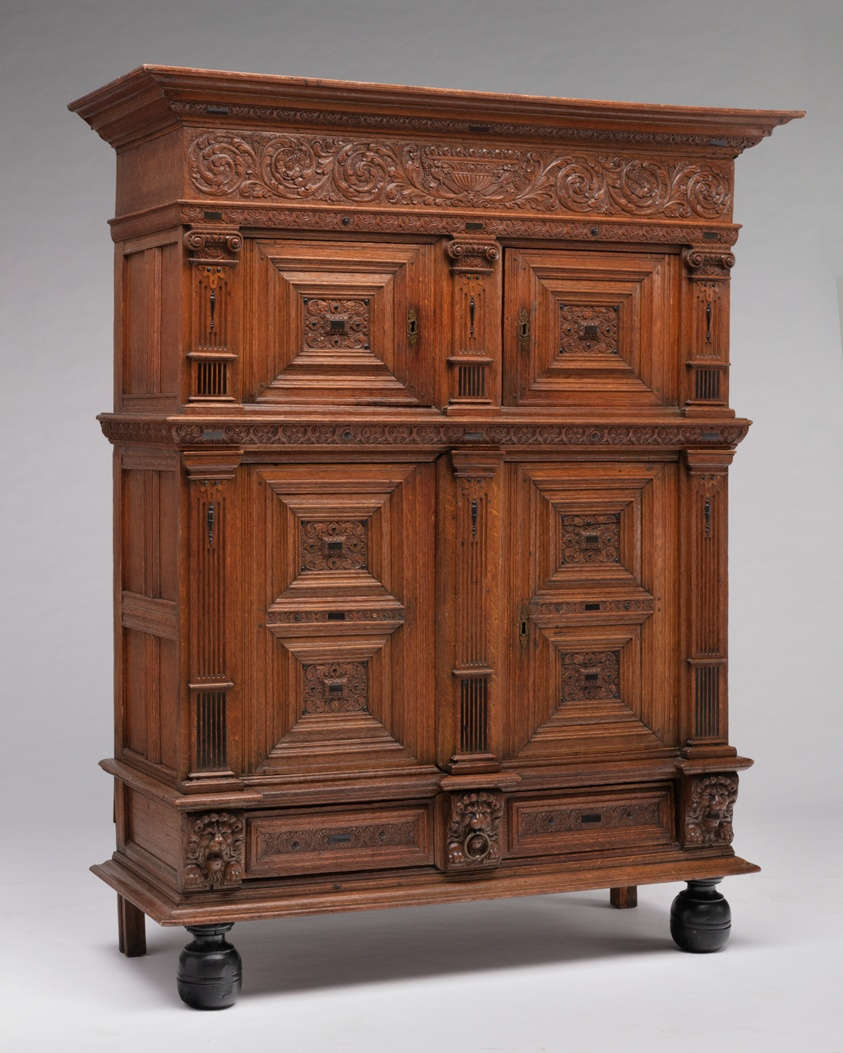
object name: Furniture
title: Linen Cupboard (Kast)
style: Baroque, Mannerism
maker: The Netherlands, probably Amsterdam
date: 1630/50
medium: Oak, pearwood, hardwood, paint, iron, and brass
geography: Netherlands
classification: furniture; decorative arts; functional object; furnishings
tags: lions, animals, architecture